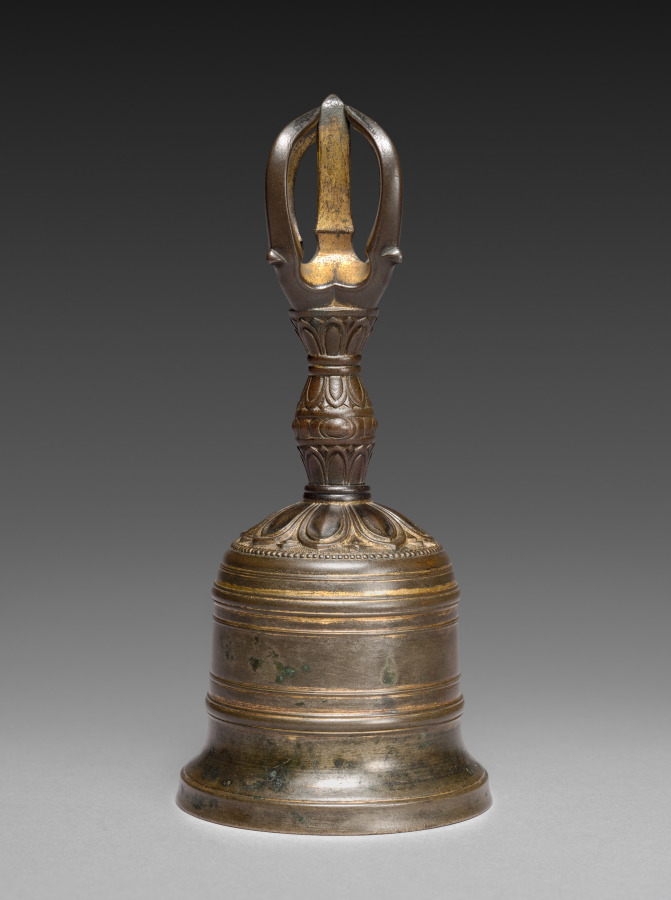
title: Five-pronged Vajra Bell (Gokorei)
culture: Japan, Kamakura period (1185–1333)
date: early 1300s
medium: gilt bronze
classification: Metalwork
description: The five prongs of this bell symbolize the Buddhist “Five Perfections”—generosity, morality, patience, perseverance, and concentration. The mouth of the bell symbolizes the “Sixth Perfection” of wisdom. The bell was used in Japanese Esoteric Buddhist rituals along with vajra pestles, or kongōsho.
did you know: Vajras are symbolic weapons, representing the properties of a diamond (indestructibility) and a thunderbolt (irresistible force), still used in Buddhist ceremonies today.